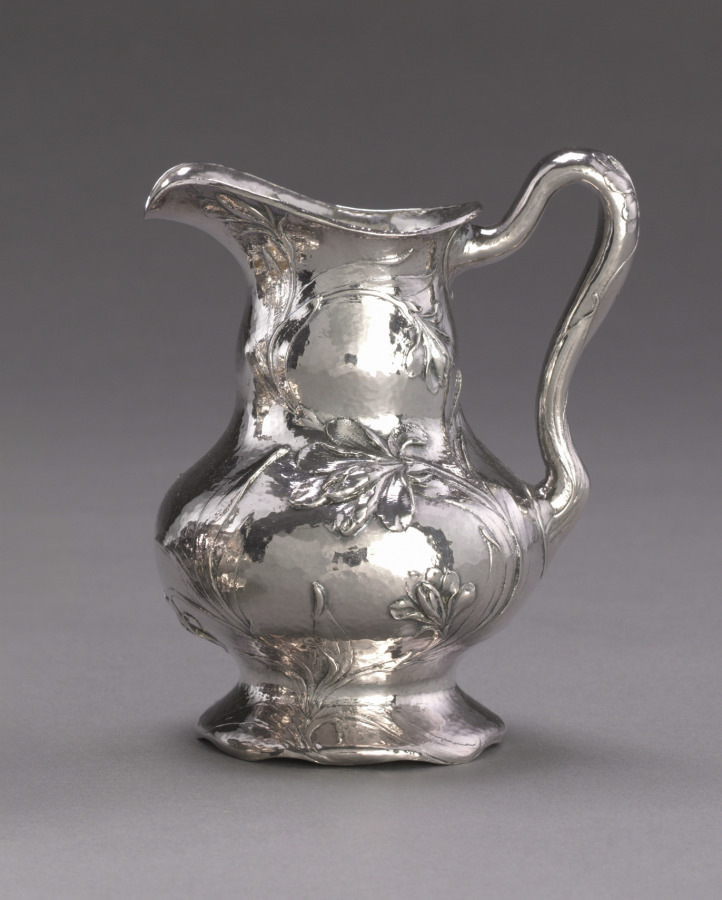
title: Martelé Sugar Bowl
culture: America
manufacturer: Gorham Manufacturing Company (America, est. 1831)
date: c. 1900–1910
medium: silver, ivory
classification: Silver